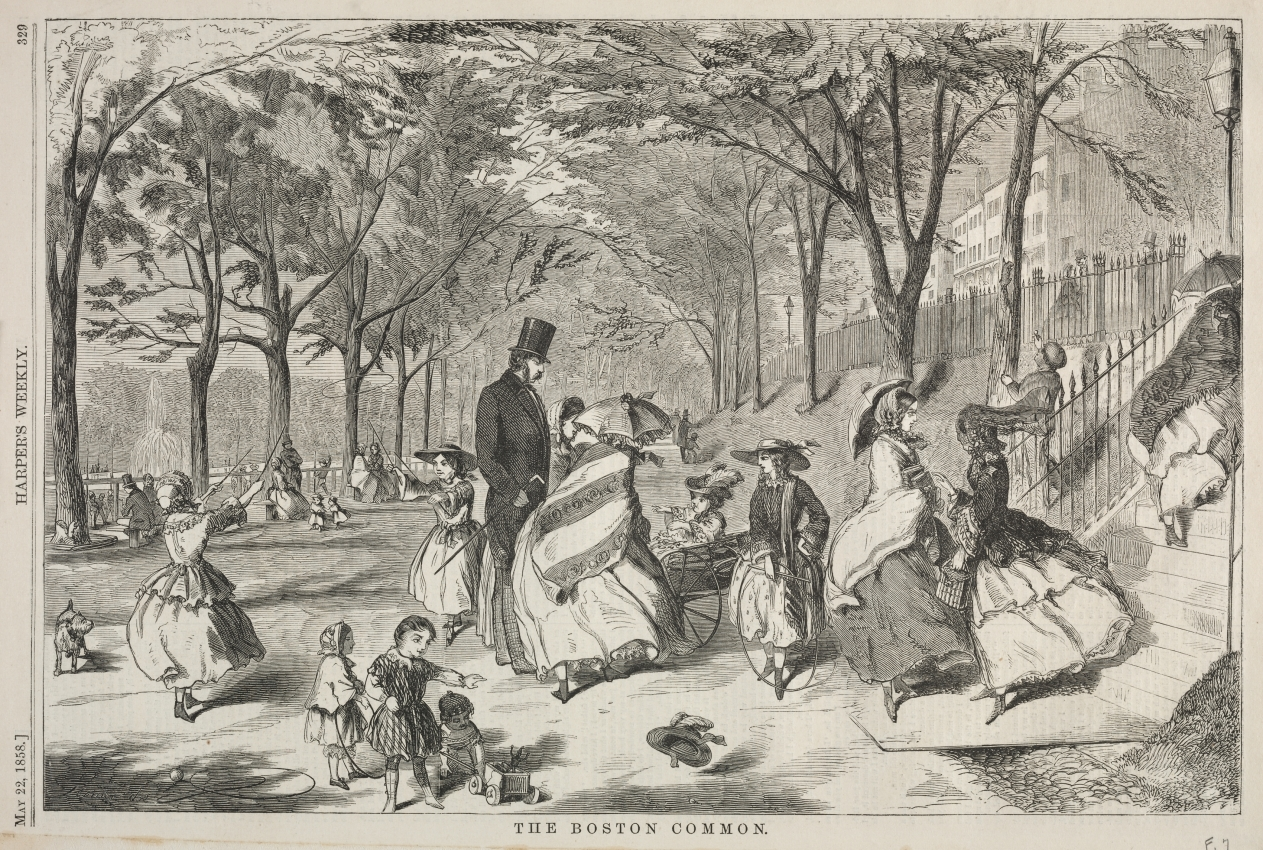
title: The Boston Common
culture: America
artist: Winslow Homer (American, 1836–1910)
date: 1858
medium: wood engraving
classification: Print